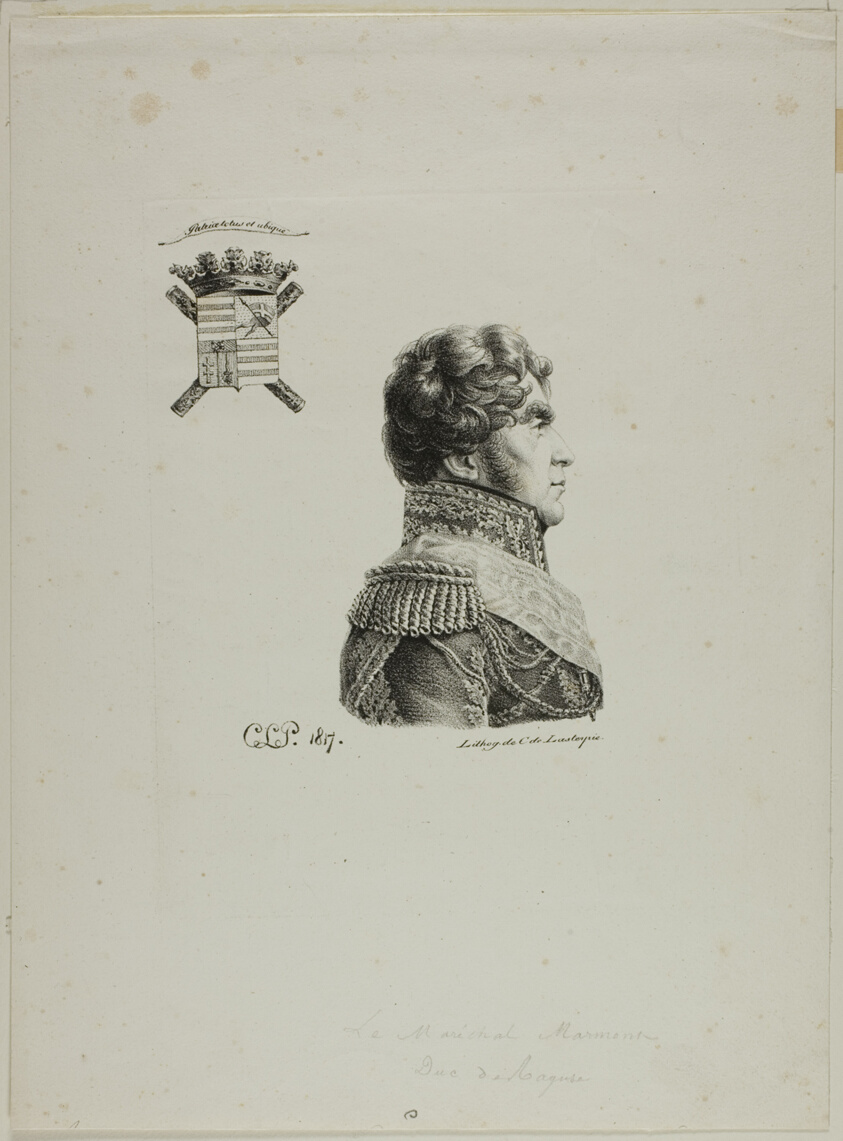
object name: Print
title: Portrait of Maréchal Marmont, Duc de Raguse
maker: Charles Edward Crespi Le Prince (French, 1784-1855); printed by Comte de Charles Philibert Lasteyrie du Saillant (French, 1759-1849)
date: 1817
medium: Lithograph in black on ivory wove paper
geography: France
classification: lithograph; print; prints and drawing